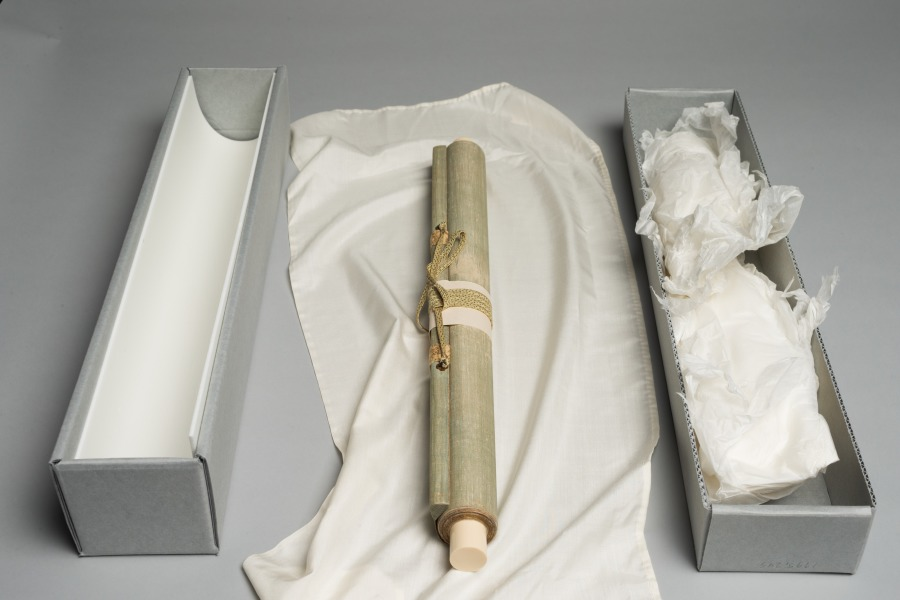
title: Rei Shōjo (Ling Zhaonu)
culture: Japan, Muromachi period (1392–1573)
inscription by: Shunoku Sōen (Japanese, 1529–1611)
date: 1500s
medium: hanging scroll, ink and light color on paper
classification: Painting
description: Legend has it that Chinese beauty Ling Zhaonu, whose name is pronounced Rei Shōjo in Japanese, was a model of devotion to her parents. She put great effort into selling baskets made by her elderly father, a devout Buddhist, thereby keeping the family afloat financially. The verse on the painting relates her story, and was inscribed by a Zen monk.